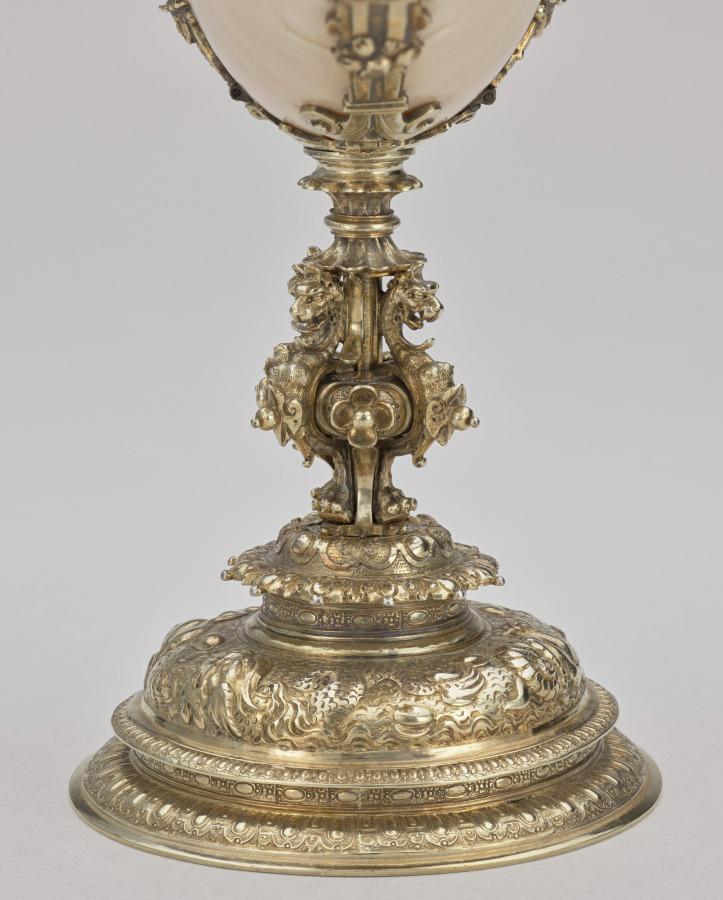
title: Nautilus Cup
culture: Netherlands, Holland, Delft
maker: Cornelis Jansz van der Burch (Dutch, active in Delft, d. 1615)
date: 1607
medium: Silver-gilt, nautilus shell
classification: Metalwork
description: Nautilus shells were brought to the Netherlands from Indonesia. Skilled Dutch silversmiths mounted them in silver, creating luxurious vessels that were sought after by wealthy collectors. Early Dutch nautilus cups are mainly associated with the city of Delft, although only a few other examples made in Delft are known from the late sixteenth and early seventeenth centuries. They feature the dramatic motif of a sea monster’s head.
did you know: The nautilus is a marine mollusk that swims by expelling water from its shell using jet propulsion.